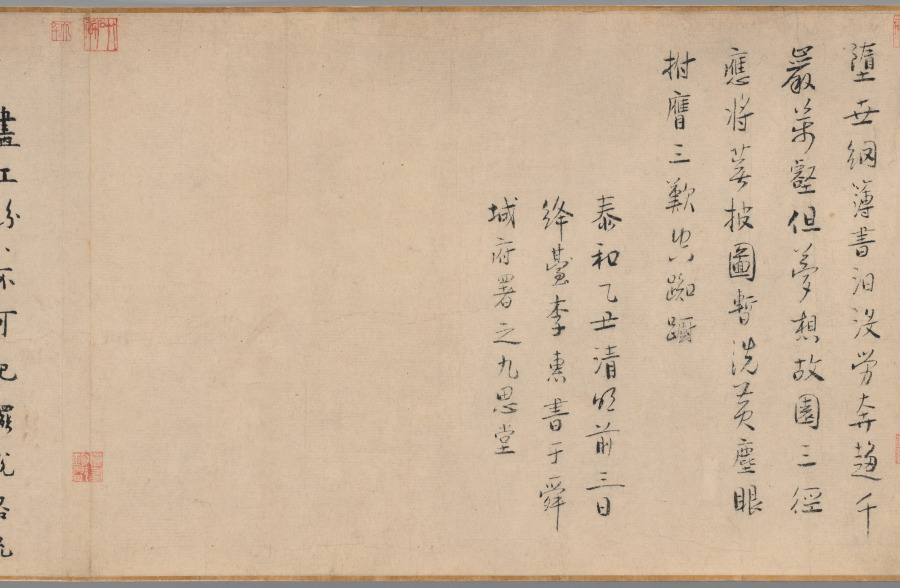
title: Streams and Mountains without End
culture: China, late Northern Song dynasty (960-1127) - Jin dynasty (1115-1234)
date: 1100–1150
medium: handscroll; ink and slight color on silk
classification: Painting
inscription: 9 colophons and 48 seals: 1 colophon, dated 1205, of Wang Wenwei 王文蔚 (dates unknown); 1 colophon, dated 1205, of Li Hui 李惠 (dates unknown); 1 colophon of Weiluo Tian Xie 蔚羅田獬 (dates unknown); 1 colophon, dated 1214, of He Yan 何言 (dates unknown); 1 colophon, dated 1326, of Cao Yuanyong 曹元用 (d. 1329) 1 colophon, dated 1332, of Kangli Zishan 康里子山 (Naonao; 1295-1345); 1 colophon, dated 1336, of Liu Zai 劉載. (dates unknown); 1 colophon, dated 1380, and 4 seals of Yang Mao 楊懋 (1300-after 1380); 4 seals of the Hou family (ca. 1340); 1 colophon of Wang Duo 王鐸 (1592-1652); 4 seals of Zhang Bingqian 張秉乾 (juren of 1729); 8 seals of Liang Qingbiao 梁清標 (1620-1691); 2 seals of the Qianlong emperor (r. 1736-95); 4 seals of the Jiaqing emperor (r. 1796-1820); 3 seals of the Xuantong emperor (r. 1909-11); 2 seals of Ye Gongchuo 葉恭綽 (1881-1968); 17 seals of Zhang Yuan 張爰 (Zhang Daqian 張大千, 1899-1983).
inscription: Colophon 1. Wang Wenwei 王文蔚. Dated third month and third day, 1205, under the reign of Zhangzong of the Jin dynasty. 造物元無心，山川秀氣聚。畫手亦無盡，各出新意度。 誰將妙林泉，淡墨寫縑素。重巒疊嶂間，三兩人家住。 茅舍隔素籬，小橋通細路。溪上數葉舟，雅有物外趣。 嵓崦藏招提，依稀認窗戶。山色四時宜，雲煙自朝暮。 不知塵世中，此景在何處。收拾買山錢，投老好歸去。 泰和乙丑三月三日平原王文蔚謹再拜，書于河東縣署之野趣堂。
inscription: Colophon 2. Li Hui 李惠. The colophon was written three days before the Qingming Festival in 1205. 畫師慣在山中居，含毫吮墨聊自娛。 閑將一段冰霜絹，寫出千里江山圖。 前山後山互出沒，山腰林樾相縈紆。 危橋澗溜瀉鳴玉，山根一匯為平湖。 波平短艇快漁釣，雲深細徑來樵蘇。 僊宮梵宇占幽勝，雕欄複閣森蓬壺。 往來行客煙靄外，飄飄野店青帘孤。 人家雞犬聲相接，熙熙化日安唐宇。 嗟余嗜好何其迂，膏肓泉石真吾徒。 一行作吏墮世網，薄書汨沒勞奔趨。 千巖萬壑但夢想，故園三徑應將蕪。 披圖暫洗黃塵眼，拊膺三嘆空踟躕。 泰和乙丑清明前三日絳臺李惠書于舜城府署之九思堂。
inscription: Colophon 3. Weiluo Tian Xie 蔚羅田獬. 畫工紛紛不可紀，擺脫俗流幾人耳。 夫誰援筆掃鵝溪，一段風煙且千里。 白波青嶂渺無窮，水接山兮山插水。 小橋野店相勾連，古寺樓臺突兀起。 飄然氣象與神俱，但患未明孰姓氏。 郭熙雖老典型存，為問主公無乃是。 此畫世希當寶藏，無與碌碌同一視。 更看卷首數公詩，奇絕清新相表裏。 蔚羅田獬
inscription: Colophon 4. He Yan 何言. Written in 1214. 萬有來自無，一真歸所託。畫師得三昧，胸中幻丘壑。 百態逐墨破，群形隨筆落。地近迹分明，天遙痕隱約。 雲物自吐吞，峯巒非斧鑿。江鄉閴無市，谷關常不鑰。 中有野夫閑，童琴而歩鶴。酒斾出籬懸，漁舟臨岸泊。 澗樹蔽橋樑，巖松迷殿閣。岑疊宿霧重，野曠林煙薄。 危棧接縈紆，亂泉通脈絡。途中人往來，僕馬何羸弱。 怪石虎踡跼，古木龍蟠錯。一幅宜好收，千金非易博。 玉堂閑卷舒，眼界增寥廓。視險尚寛平，見危除慘虐。 氣象溢國華，川澤資廟略。功名業已書，歸去鞭先著。 但知色即空，何是今非昨。飽乎仁智心，箇中無限樂。 貞祐甲戌秋暮，東營何言題。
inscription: Colophon 5. Cao Yuanyong 曹元用 (d. 1329). Dated 1326. 岸擁危橋斷，溪浮小艇斜。 萬山最深處，依約兩三家。 泰定丙寅秋，曹元用題。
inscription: Colophon 6. Kangli Zishan 康里子山 (i.e., Kangli Naonao). The colophon bears a date of 1332. 右溪山圖，意韻蕭灑。一見使人有烟霞之想，真可珍藏。又有□金諸名勝題詩其左。兵火之餘， 殊不易得也。 至順三年暮春之月，康里子山跋。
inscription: Colophon 7. Liu Zai 劉載. 雲拂埜田閑種玉，雨餘巖溜碎傾金。 幾時也結團茆去，麟閤恬然不挂心。 至元二年正月，長安劉載載之謹錄上。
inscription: Colophon 8. Yang Mao 楊懋 (1300–after 1380). 觀此圖，經營位置，筆法高古，山明石潤。其橋梁、路道、樹林、人物、遠近；一一誠得真山水之深趣。非當時名筆有大才者不能至此。不必問其誰何，可為神品。况宋金元三朝名公所跋，尚不能記，想其來尤遠矣。然而物經累變而尚存，是物之有壽者也。余不復再論。文顯其保之。洪武庚申春，八十翁楊懋觀。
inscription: Colophon 9. Wang Duo 王鐸 (1592–1652). 文蓀親翁博雅，文詩鴻暢。舍弟持此喜觀，遂抽管題數語： 山勢委折，筆墨無痕。宋人中如此不多見也。譬之兵家，當是韓白。王鐸。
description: Streams and Mountains without End was a landmark acquisition of 1953, made just a year after Sherman Lee had returned to Cleveland as curator of Oriental art. He acquired it with the intention to provide "a more than adequate foundation for a fine collection of Chinese landscape painting." This impressive work demonstrates the culmination of stylistic developments in Chinese monumental landscape painting following the Northern Song tradition. It represents a journey through a landscape, making it a fitting metaphor for Lee’s journey of discovery and achievement over a lifetime.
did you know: The portrayal of the distant lands is rich with details like pavilions, villages, and human activities.